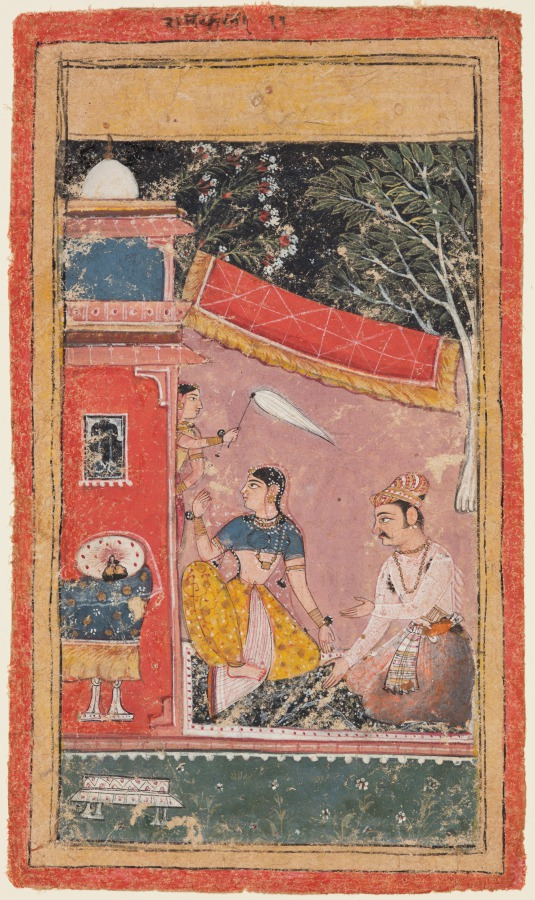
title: Lovers on a Terrace: Ramakali Ragini of Hindol, from a Bundi Ragamala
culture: Northwestern India, Rajasthan, Rajput Kingdom of Bundi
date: c. 1610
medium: gum tempera and gold on paper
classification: Painting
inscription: rāmakalī. 11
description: Sitting on a floral carpet outside a bedchamber, a noble dressed in Mughal apparel including Jahangir-period turban and decorated sash is trying to assuage his displeased consort. The lady turns her face away from the man, showing that his appeals have been ignored. The black sky indicates that their quarrel takes place in the middle of the night.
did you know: The red canopy with a yellow border above them is to be used as a fan.